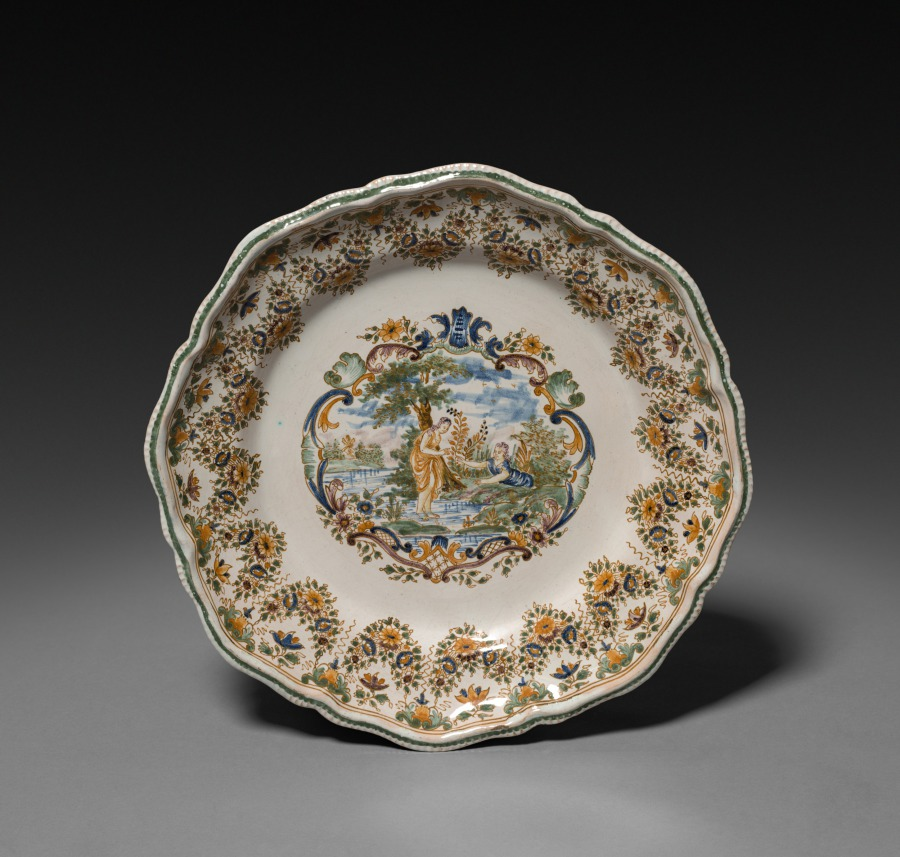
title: Plate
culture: France, Moustiers style, 20th century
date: 1900s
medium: faience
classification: Ceramic